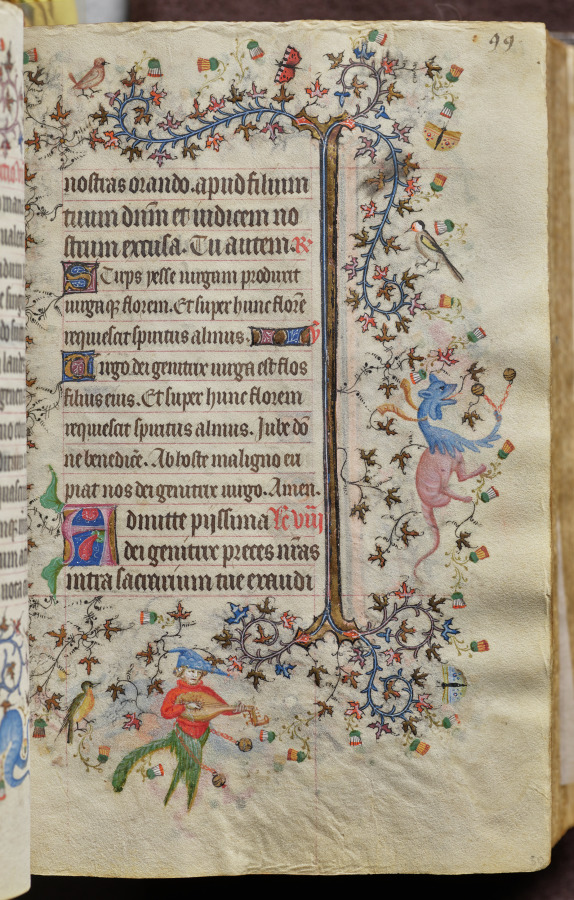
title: Hours of Charles the Noble, King of Navarre (1361-1425): fol. 50r, Text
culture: France, Paris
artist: Master of the Brussels Initials and Associates (French)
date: c. 1405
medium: ink, tempera, and gold on vellum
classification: Bound Volume